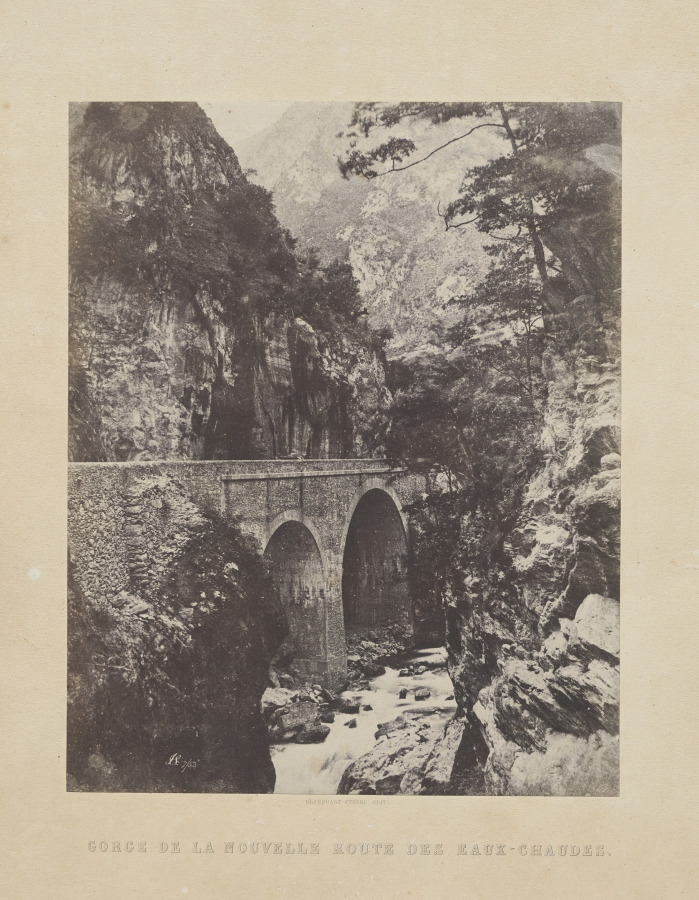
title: Gorge de la Nouvelle Route des Eaux-Chaudes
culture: England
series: Souvenirs des Pyrenées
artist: John Stewart (British, 1800–1887)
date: c. 1851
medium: salt print from a waxed paper negative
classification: Photograph